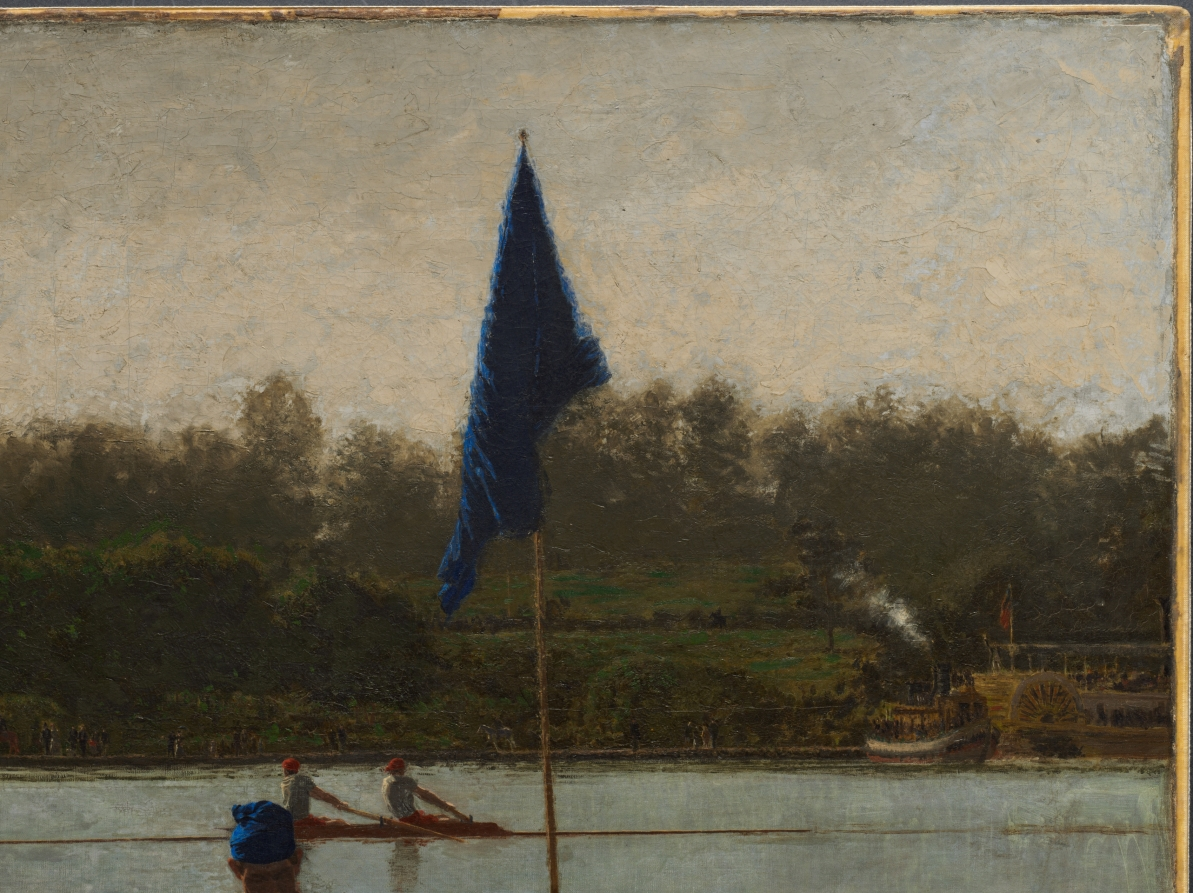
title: The Biglin Brothers Turning the Stake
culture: America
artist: Thomas Eakins (American, 1844–1916)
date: 1873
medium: oil on canvas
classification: Painting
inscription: signed lower left: EAKINS 73.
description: Eakins's painting celebrates athletic teamwork while commemorating an actual event, a famous rowing race that took place on the Schuylkill River in Philadelphia during May 1872. Throngs of spectators line the riverbank and watch as Barney and John Biglin negotiate the tricky turn around a stake marking the halfway point in the contest. Their competitors, seen in the middle distance at the right, lag behind. The Biglin brothers won the race, cementing their status as the most celebrated oarsmen of the era. Trained in the United States and France, Eakins spent almost his entire artistic career in his hometown of Philadelphia. He is renowned for the unsentimental realism in his paintings, whose compositions he developed through painstakingly prepared figure and perspective drawings.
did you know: Rowing was among the most popular spectator sports in the U.S. during the 1870s.